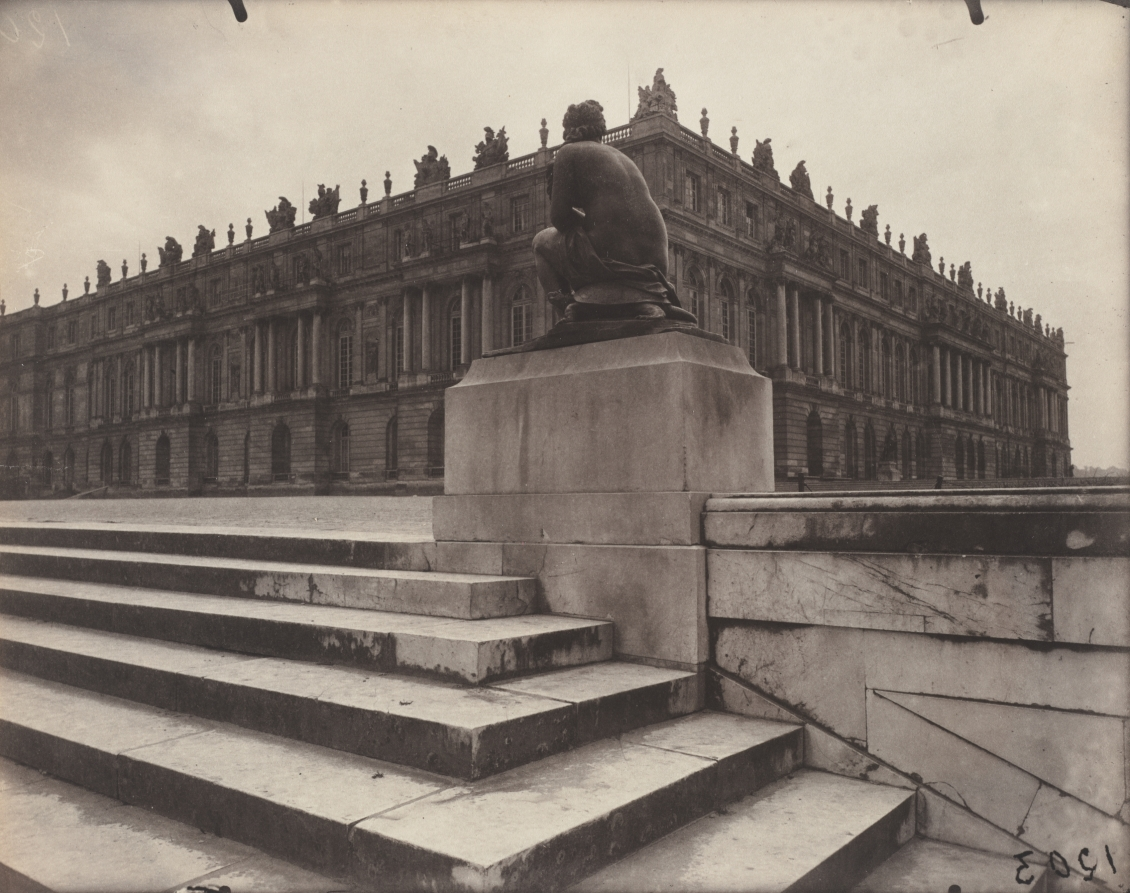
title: Versailles, Chaste Venus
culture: France, 20th century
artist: Eugène Atget (French, 1857–1927)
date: 1922–1923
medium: albumen print, gold toned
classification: Photograph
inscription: Written in pencil on verso: "Versailles 1203"; scratched into negative: "1503 [sic]"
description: During the first quarter of the 20th century, Eugène Atget photographed the French urban experience. Periodically, from 1901 to 1926, Atget was particularly attracted to the grounds and gardens at the palace of Versailles, photographing its walks, fountains, and statues during different seasons. An eerie silence and mysteriousness frequently suffuses his images, as it does in this haunting photograph of Antoine Coysevox's bronze sculpture of Venus, positioned on a raised plinth facing the palace's garden facade. With the placement of his camera, Atget brought a carefully ordered harmony to the composition through the alignment of various architectural and sculptural elements.